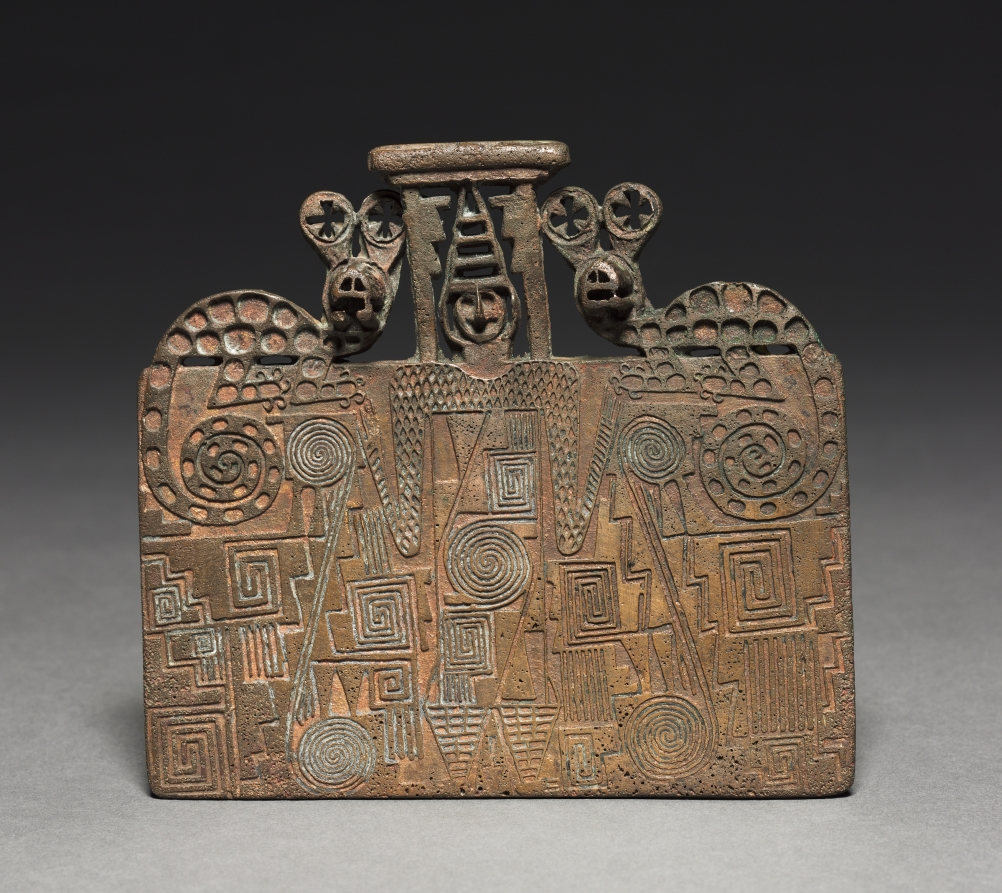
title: Plaque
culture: Argentina, La Aguada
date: 600–900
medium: bronze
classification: Metalwork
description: In the center of this plaque is a frontal human figure, wearing a cross-hatched shirt; a geometrically patterned robe; and a tall, conical helmet. He is flanked by spotted felines with long, curling tails, positioned above fields of patterning. The plaque belongs to a group of about ten closely similar pieces that constitutes the artistic high point of metallurgy in the southern Andes.